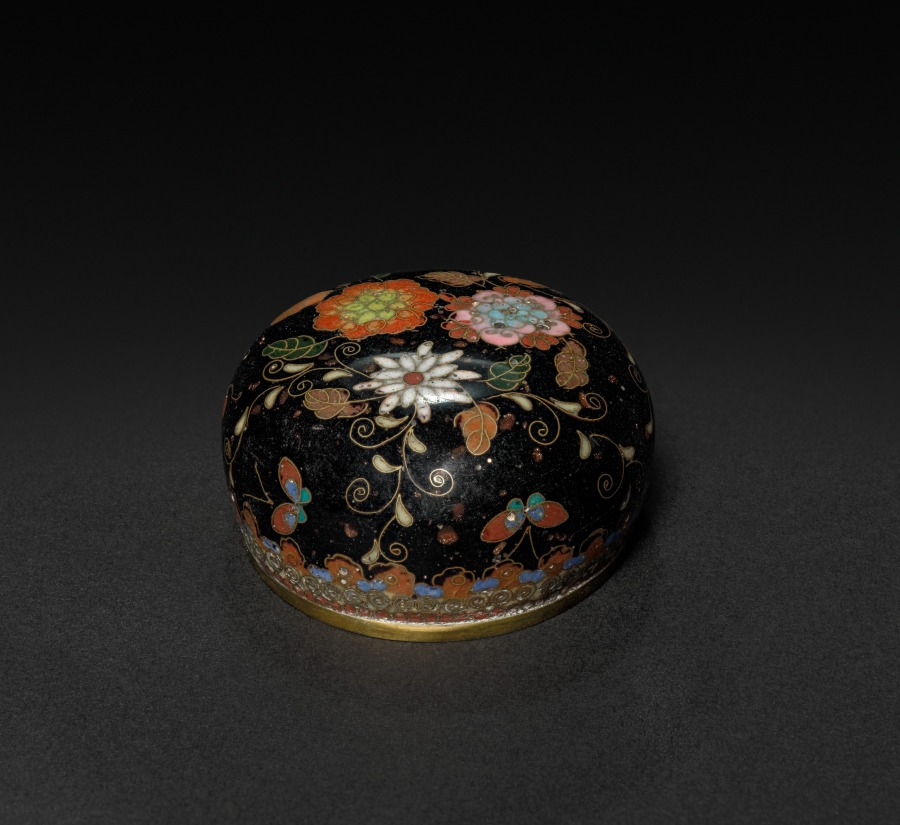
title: Ginger Jar (lid)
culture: Japan, Meiji period (1868–1912) to Taishō period (1912–26)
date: early 1900s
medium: cloisonne enamel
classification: Enamel